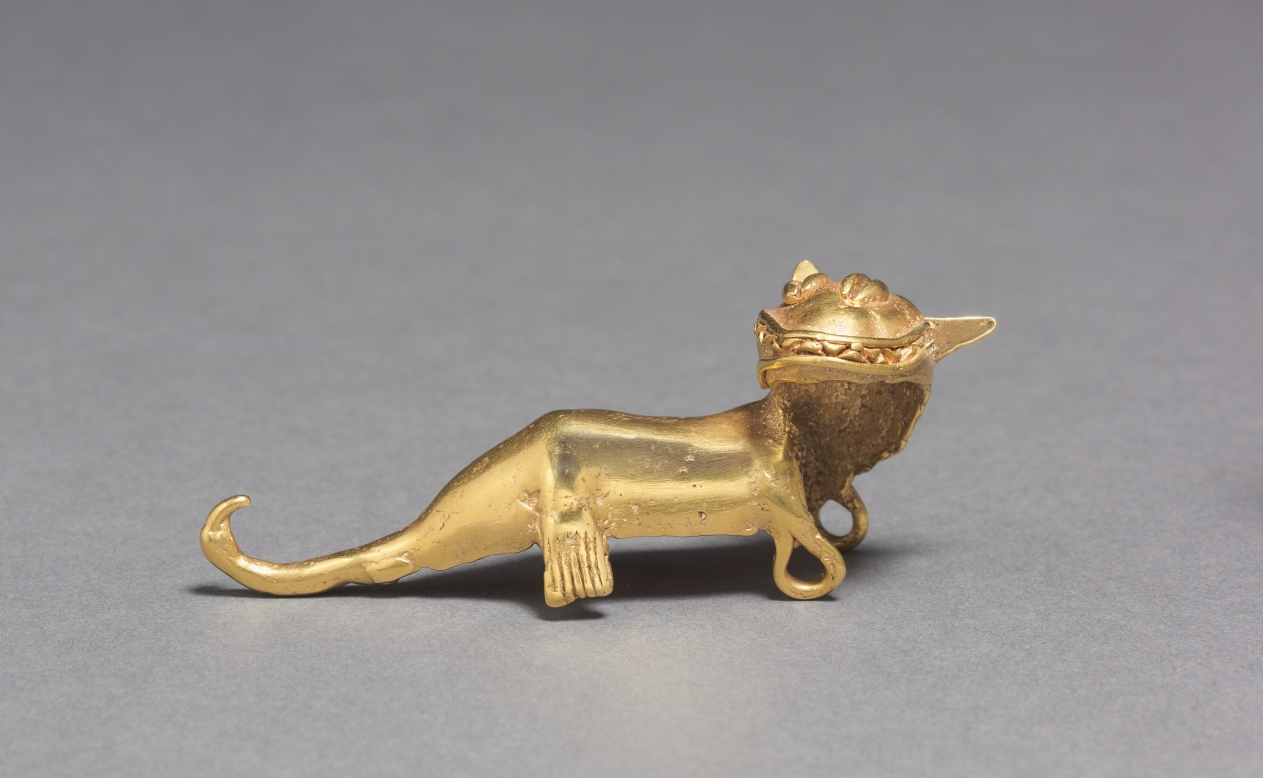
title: Jaguar Pendant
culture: Panama, Veraguas style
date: 800–1500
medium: cast gold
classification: Metalwork